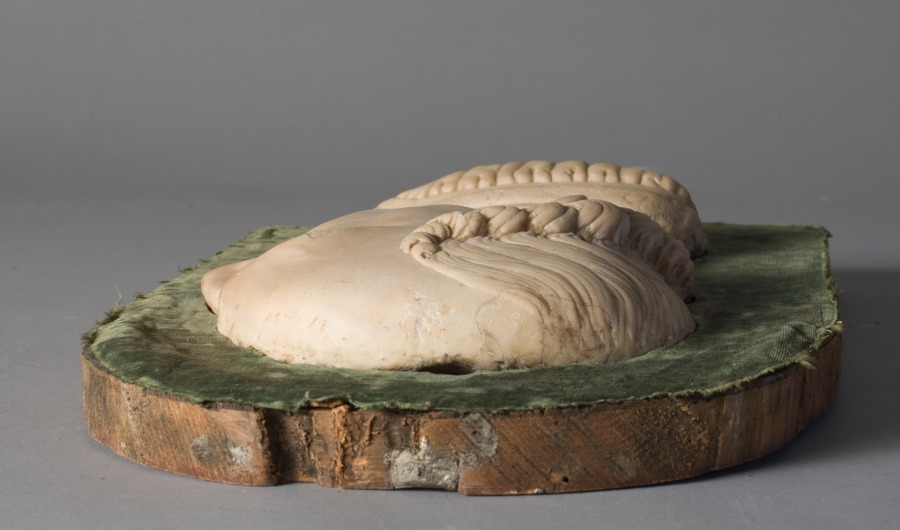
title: Portrait of Francesco Sforza and Frame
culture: Italy, Lombardy, 15th century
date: 1450–1499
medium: marble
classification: Sculpture